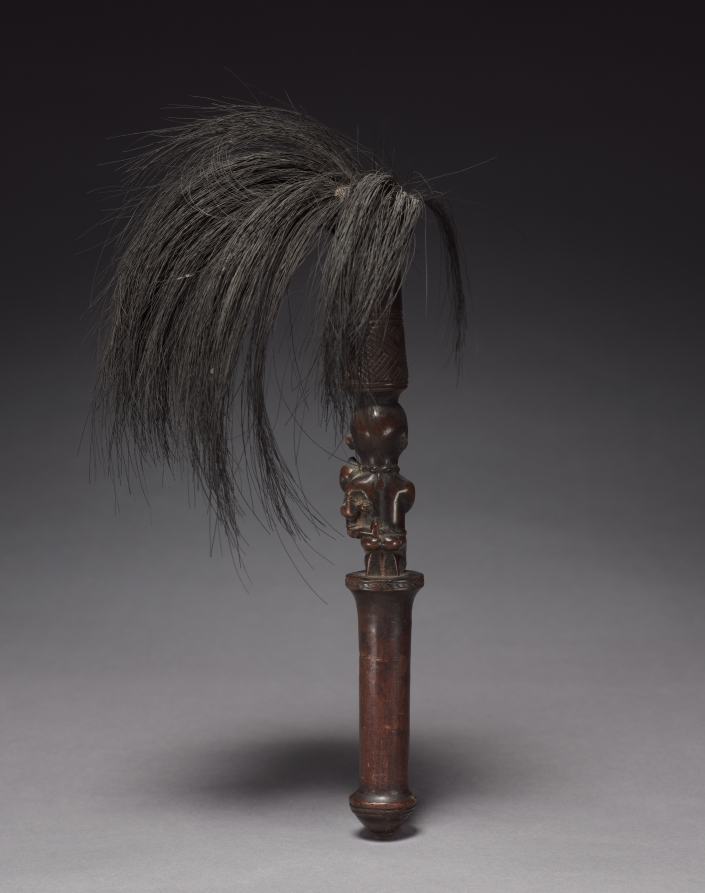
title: Flywhisk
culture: Africa, Central Africa, Democratic Republic of Congo (most likely), Cabinda, or Republic of the Congo, probably Yombe-style maker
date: late 1800s-early 1900s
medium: Wood and animal hair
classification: Sculpture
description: In Central Africa, flywhisks denoted status, rank, and function, rather than used to whisk away flies. Commonly associated with chiefs and titleholders, they were also owned by diviners and healers. Their purpose may also have been used to purify spaces, bless people, places, or things, and settle disputes. Flywhisks rarely depict women; yet this finely carved miniature of a woman kneeling signifies obedience and respect.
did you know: Rarely do flywhisks depict a female figure.